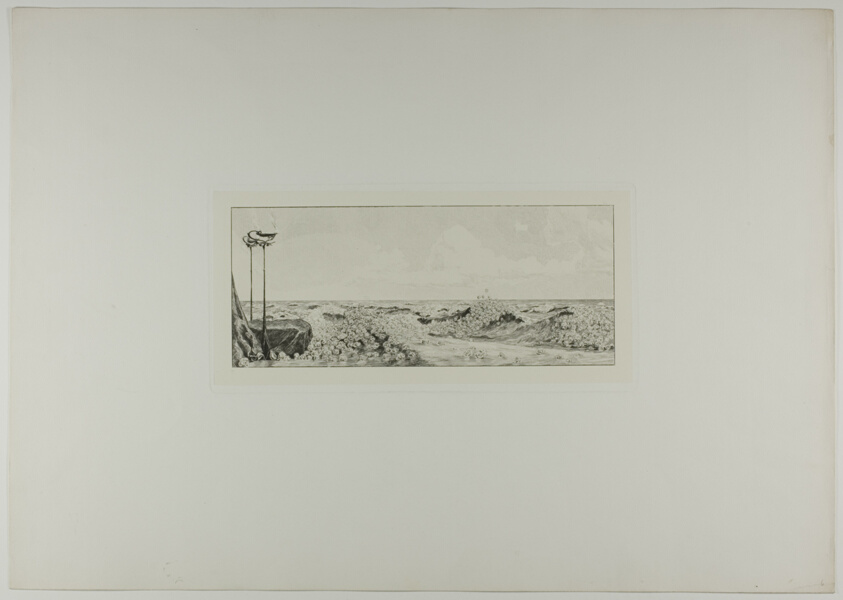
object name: Print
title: Homage, plate six from A Glove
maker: Max Klinger (German, 1857-1920)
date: 1881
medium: Etching on ivory chine collé on off-white wove paper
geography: Germany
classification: etching; print; prints and drawing